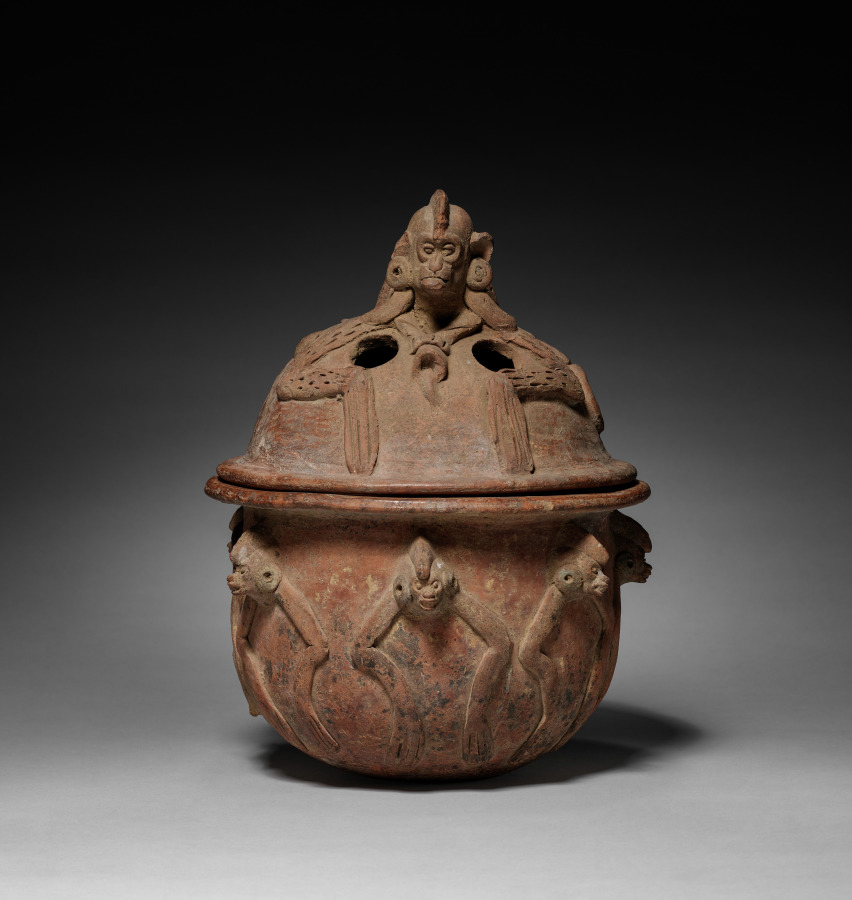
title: Incense Burner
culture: Guatemala, Quiché, San Juan Cotzal, Maya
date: 600–1000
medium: pottery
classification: Ceramic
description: According to the Popol Vuh, a sixteenth-century Quiché Maya manuscript, the world has been created and destroyed twice, and we now live in the third creation. In the second creation, human beings were made from wood and reeds. They lacked souls and minds, and they did not revere their creator. Because of these imperfections, most were killed by an uprising of utensils and domestic animals. Monkeys are the descendents of the survivors.